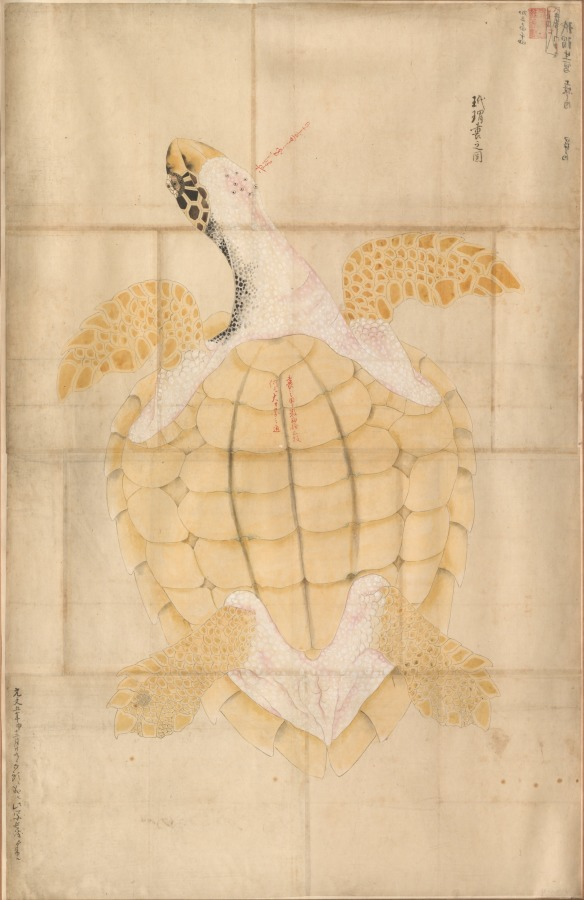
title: Tortoise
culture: Japan, Edo period (1615–1868)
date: 1700s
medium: watercolor on paper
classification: Painting